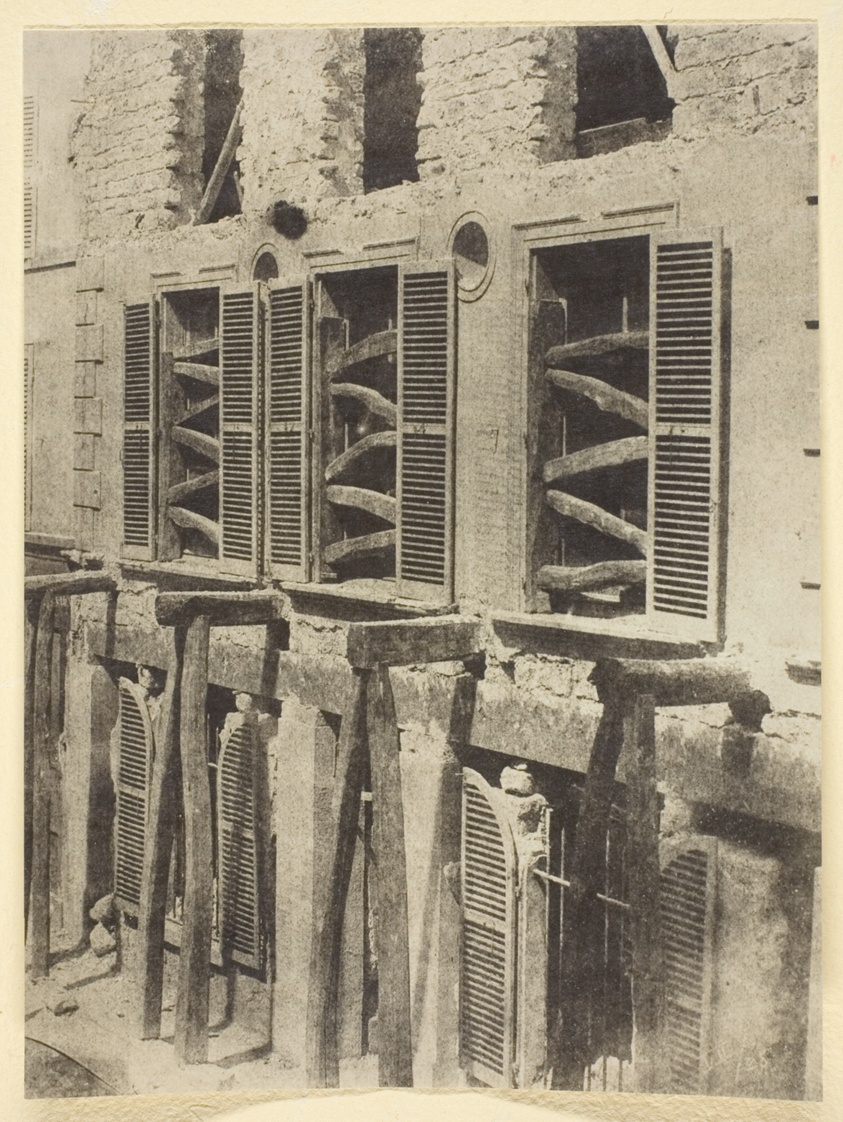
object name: Photograph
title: Vieille Maison en Restauration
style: 19th century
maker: Hippolyte Bayard (French, 1801–1887)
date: 1842/50, printed 1965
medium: Gelatin silver print, No. 13 from the portfolio "Bayard: XXV Calotypes, 1842-1850" (1965)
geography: France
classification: photographic process; photography; photograph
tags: Collected by Hugh Edwards